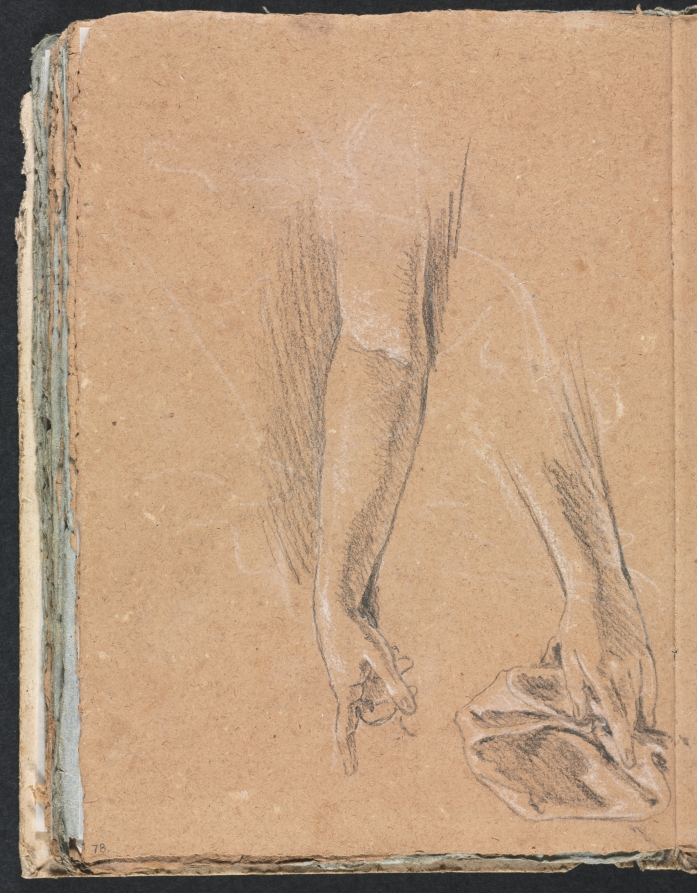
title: Verona Sketchbook: Arms and hands with drapery (page 78)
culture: Italy, 18th century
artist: Francesco Lorenzi (Italian, 1723–1787)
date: 1760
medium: black chalk with white heightening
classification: Bound Volume